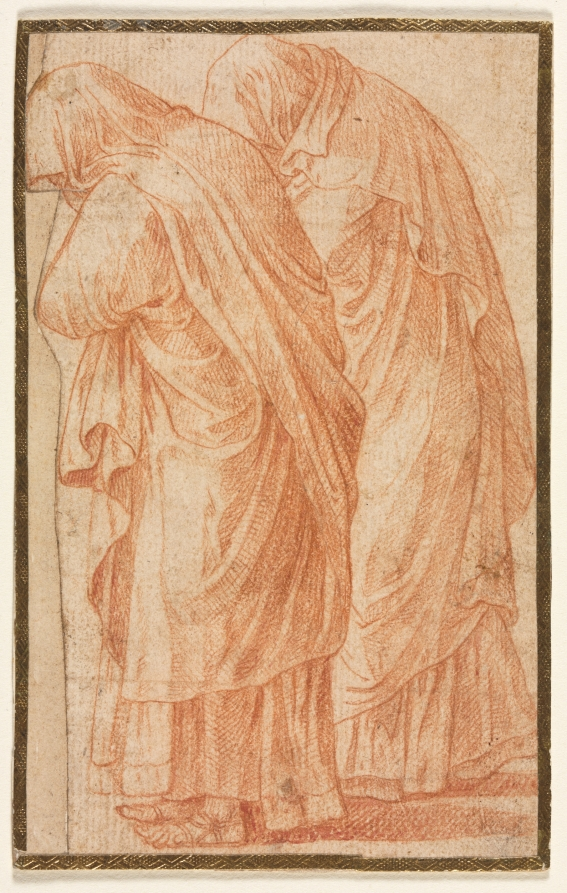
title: Study of Monks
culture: France, 17th century (?)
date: 1600s(?)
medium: red chalk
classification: Drawing